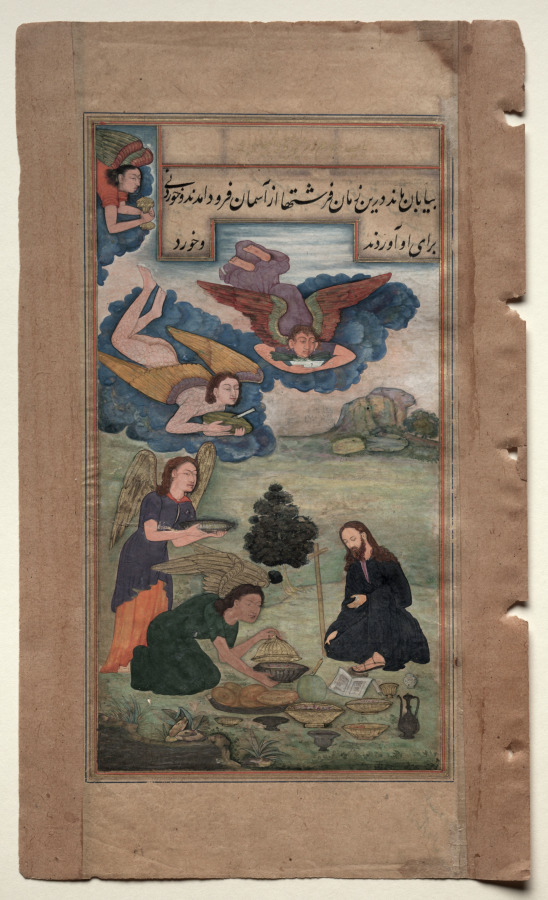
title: Angels bring food to Jesus in the wilderness (folio 55 recto), from a Mirror of Holiness (Mir’at al-quds) of Father Jerome Xavier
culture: Mughal India, Allahabad, made for Prince Salim (1569–1627)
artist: Muhammad Sharif (Indian, active c. 1600)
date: 1602–4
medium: Gum tempera, ink, color, and gold on paper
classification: Manuscript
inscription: Signature of the artist, Muhammad Sharif (Indian, active c. 1600), is written in the tiny pot by Jesus's foot.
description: To end his 40-day fast, five angels brought Jesus refreshments from heaven: breads, melons each with a knife for convenient cutting, fresh leeks, and what appear to be fragrant rice dishes and curries, along with cups of wine. Four of the angels are dressed in robes, and one is clothed only in feathers. After his baptism, Jesus spent 40 days and nights in the desert where he fasted, practiced spiritual exercises, and successfully resisted the temptations of Satan. Many of the rocks in this painting have faces, called grotesques. This page is the only surviving folio from this manuscript that has an artist’s signature, written in the tiny pot by Jesus’s foot.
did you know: The artist has put faces in the rocks, following a Persian convention.